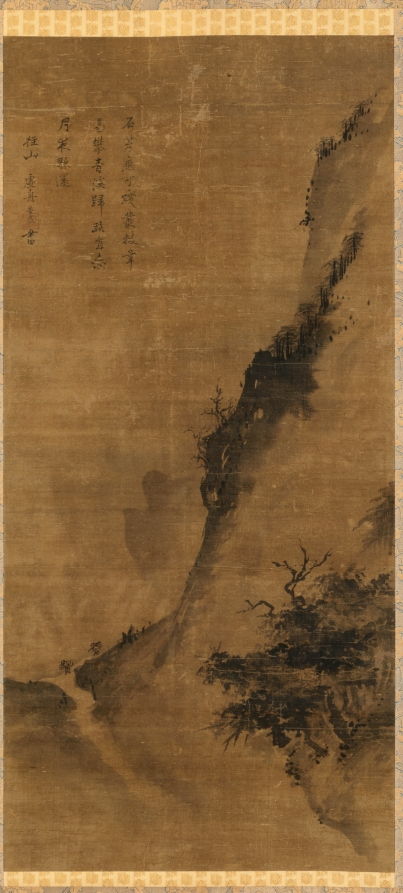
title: Landscape with Woodcutters Returning Home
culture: China, Southern Song dynasty (1127-1279)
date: 1200s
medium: hanging scroll, ink on silk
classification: Painting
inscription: inscribed by Xuzhou Pudu 虛舟普度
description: In late Song dynasty Chinese Chan Buddhist temples, paintings of landscapes, animals, or plants frequently took the place of deities. This hanging scroll features the humble life of woodcutters in nature an is in keeping with the Chan emphasis on simplicity and on the spiritual benefits of manual labor. executed in broad, quickly applied washes and punctuated by dark dots and texture strokes, the work is inscribed by Xuzhou Pudu, a priest at Wanshou temple near the Southern Song capital at Lin'an (modern Hangzhou).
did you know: A landscape with identical measurements in a Japanese private collection is also inscribed by Xuzhou. They may have been a pair of flanking scrolls in a triptych.